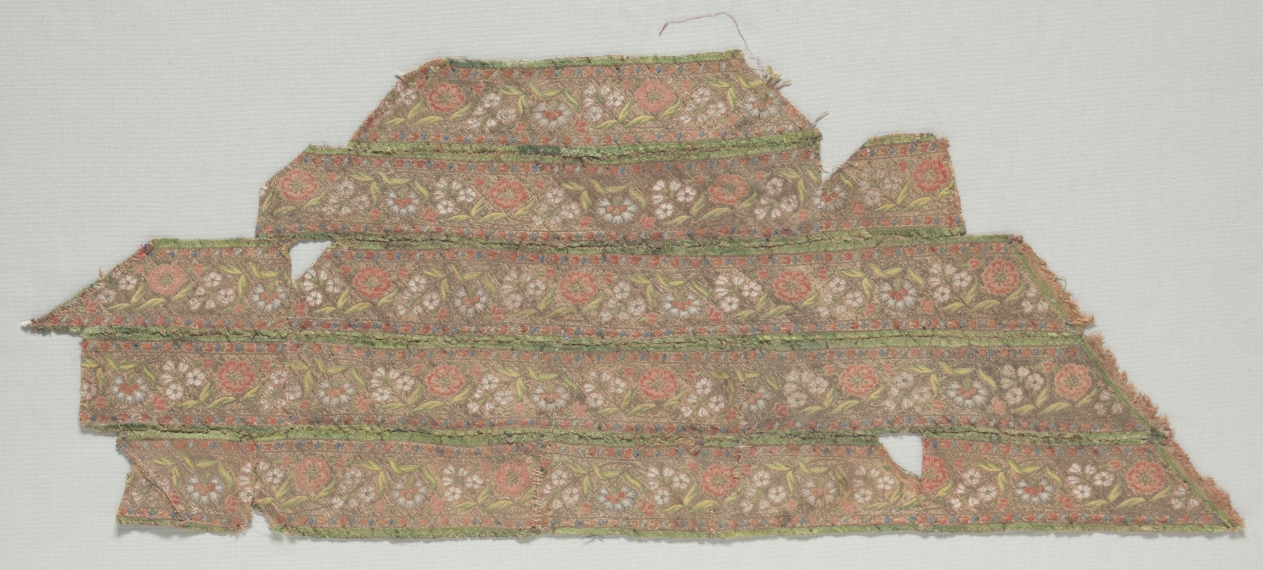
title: Silk Fragments (pieced together)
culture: Iran, 18th-19th century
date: 1700s - 1800s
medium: compound weave: silk and gold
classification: Textile